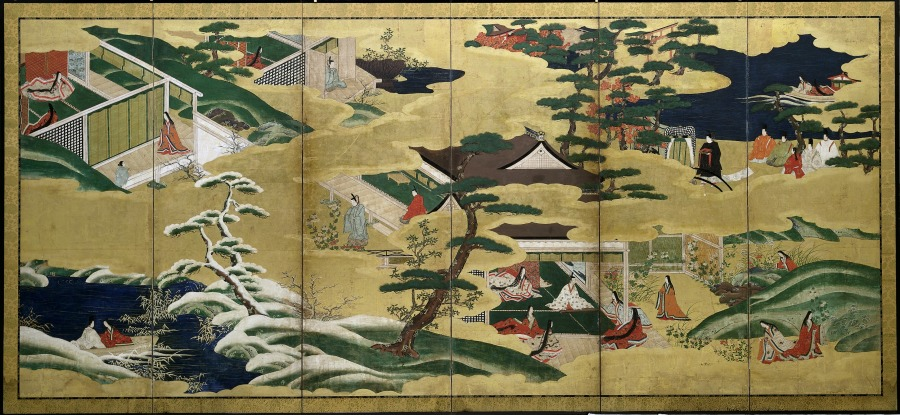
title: Scenes from the Tale of Genji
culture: Japan, Edo period (1615–1868)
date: late 1700s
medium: Pair of six-panel folding screens; ink, color, and gold on gilded paper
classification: Painting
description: Folding screens served as temporary dividers in traditional Japanese open-plan architectural spaces. This pair was inspired by Japan’s most celebrated work of literature, the Tale of Genji, written by Murasaki Shikibu, an attendant to the empress in the early 11th-century imperial court. The novel follows the love life of the “Shining Prince” Genji and delves into the psychological states of his many companions. Distinct episodes are nestled within a matrix of golden clouds and landscape elements. Each screen includes six episodes presented in a nonlinear fashion, capturing scattered highlights of the story.